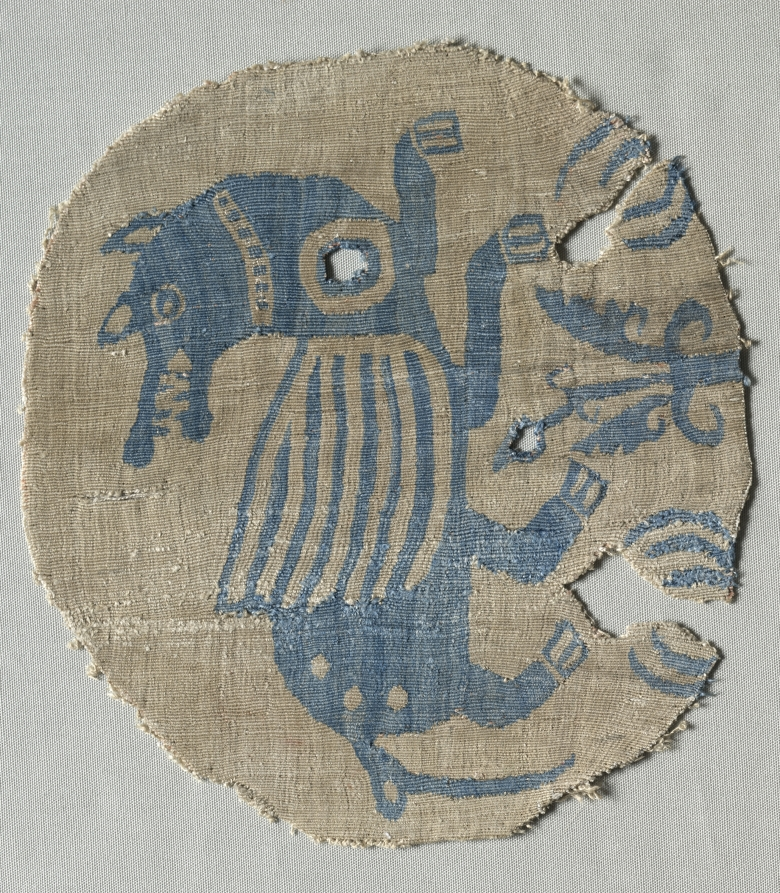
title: Fragment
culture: Iran or Iraq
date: 1000s–1100s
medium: Silk: soumak, or twisted tapestry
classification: Textile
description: The fragment preserves a winged quadruped in blue on a gray-beige background with the details of the animal in the ground color. Below the animal are foliate sprigs in blue.